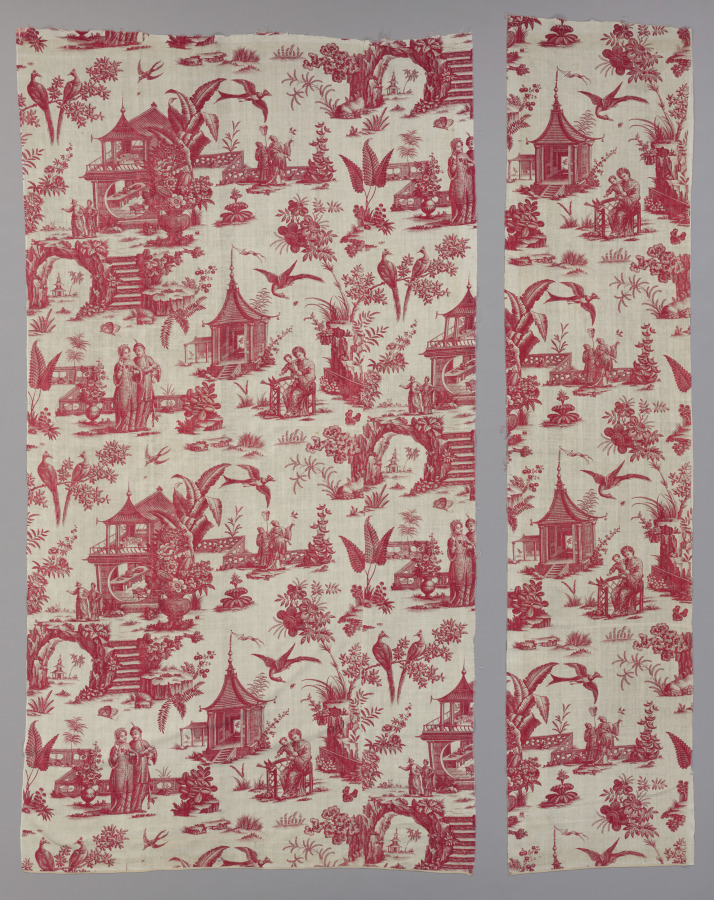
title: Copperplate-Printed Cotton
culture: England, Chambers, 18th century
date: 1700s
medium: copperplate printed cotton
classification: Textile